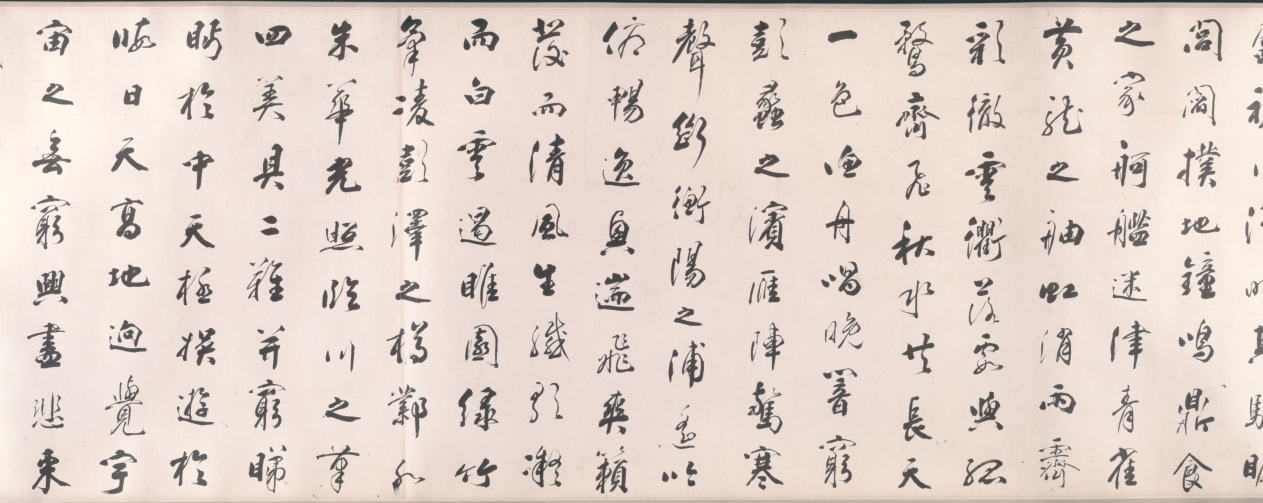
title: Calligraphy in Running Style based on Wang Bo's Essay on Tengwang Pavilion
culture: China, Changbai, Qing dynasty (1644-1911)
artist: Tiebao (Chinese, 1752–1824)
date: 1811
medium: handscroll, ink on paper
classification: Calligraphy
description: A member of the Donggo clan, Tiebao belonged to the Manchu Plain Yellow Banner army. As an official in the Qing court, he endured considerable vicissitude and his career was never smooth. Celebrated as a man of letters, he oversaw the publications of the Manchu military system as well as an anthology of poems by members of the imperial family and other Manchu dignitaries. In calligraphy, he was regarded as the equal of such eighteenth-century luminaries as Liu Yong (1720-1805) and Weng Fanggang (1733-1818). This handscroll is a work of his mature years and is exemplary of his disciplined and highly subtle approach to the art of calligraphy.